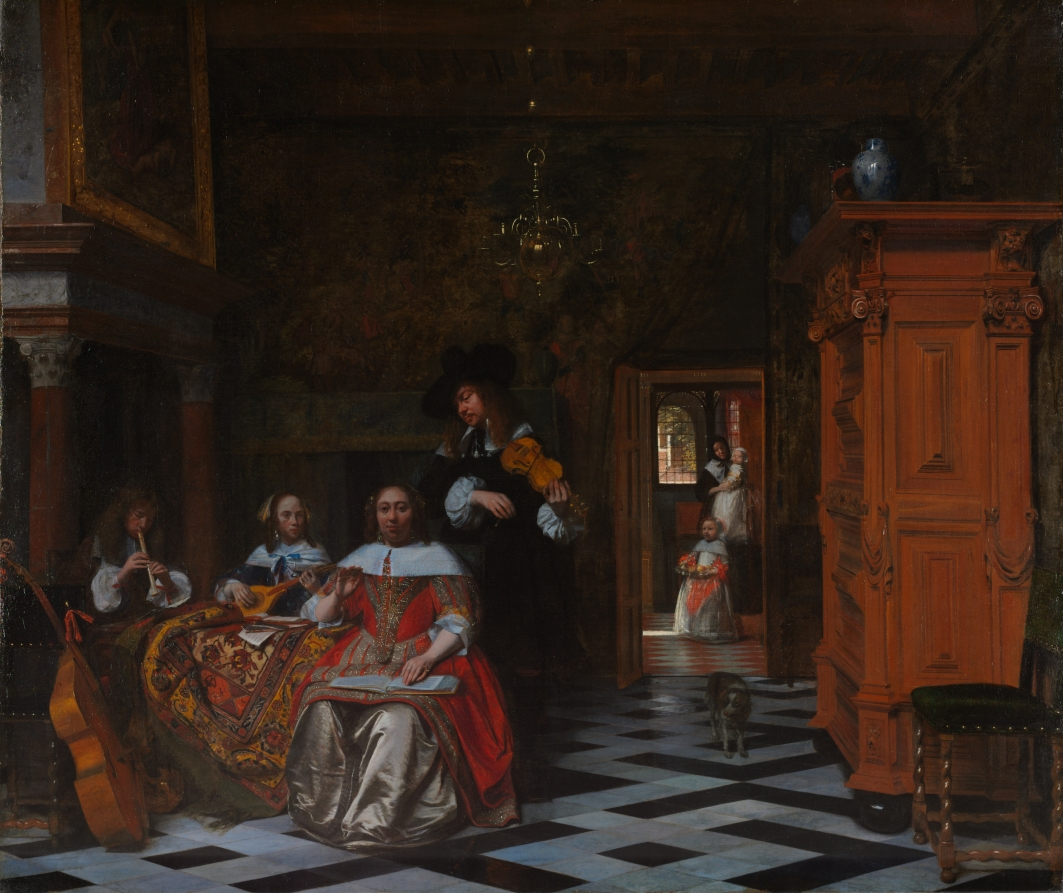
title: Portrait of a Family Playing Music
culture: Netherlands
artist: Pieter de Hooch (Dutch, 1629–1684)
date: 1663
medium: oil on canvas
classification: Painting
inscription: Signed lower left: "P D HOOCH/ 63"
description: The identity of the sitters remains unknown, although the marble floor and mantelpiece, the Transylvanian prayer rug on the table, and the silk clothes all point to the family’s considerable wealth. Furthermore, the richly carved chest at the right supports Chinese vases and Japanese lacquered boxes, a reference to the flourishing Dutch trade with Asia. Music making often took place at home, and its appearance here also signifies the harmoniousness of the family.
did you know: During this period, the Dutch Republic was the richest, most urbanized nation.